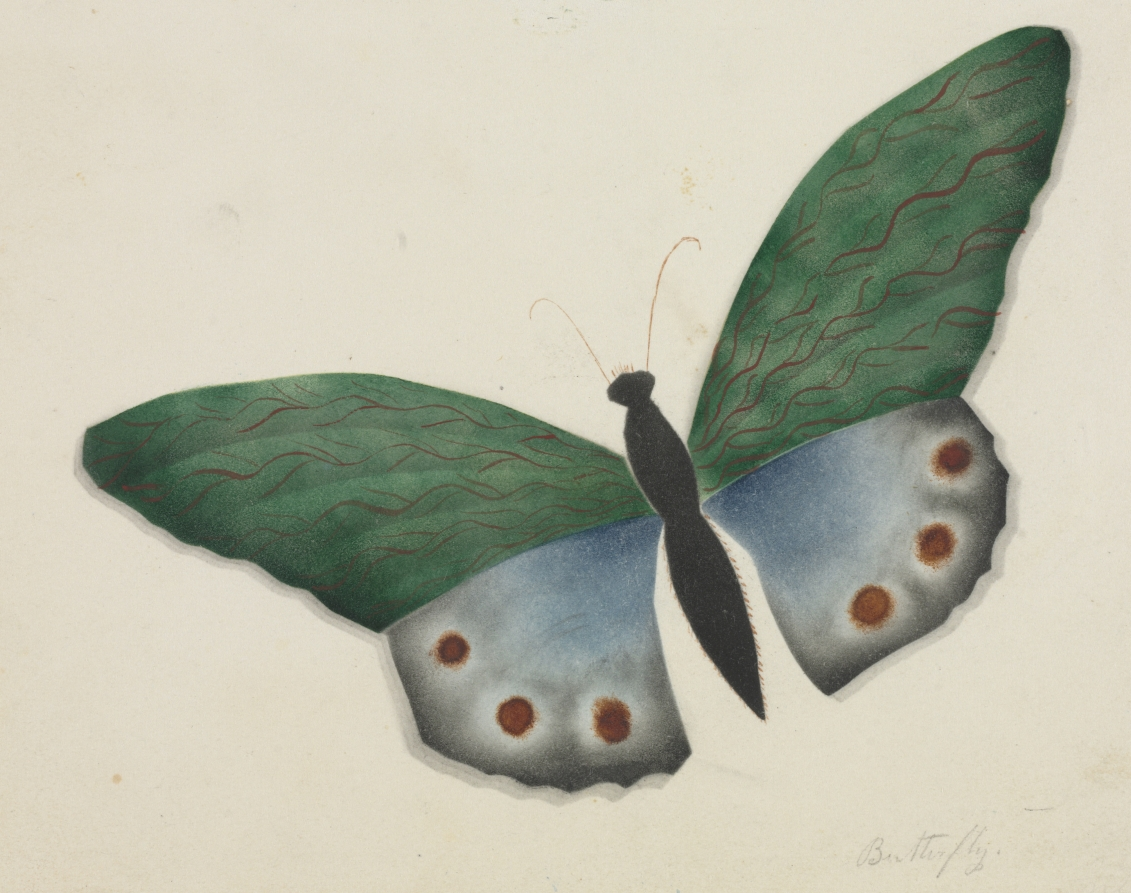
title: Butterfly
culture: America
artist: Mary Altha Nims (American, 1817–1907)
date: 1800s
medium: watercolor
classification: Drawing